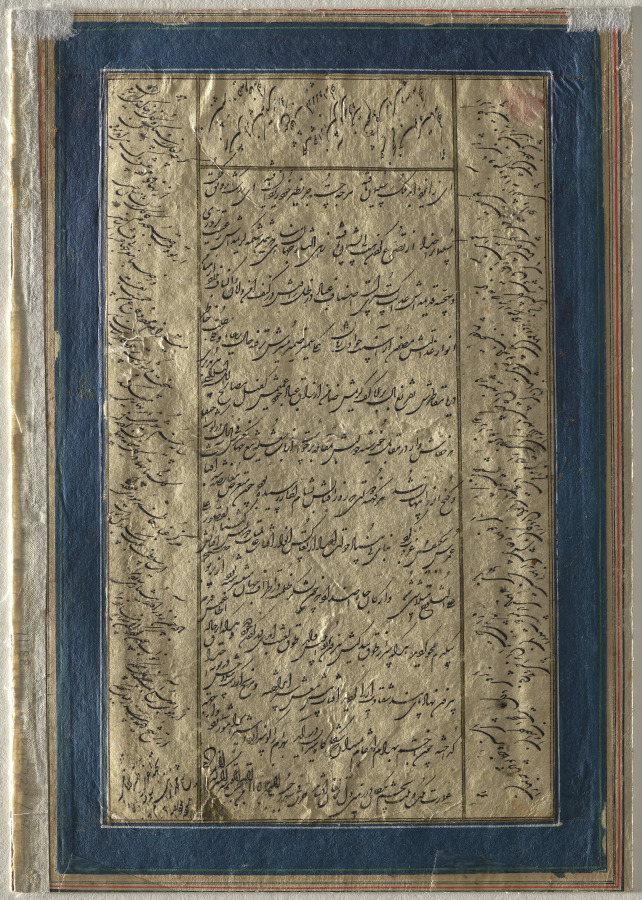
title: Grotesque Dancers Performing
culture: Mughal India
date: c. 1600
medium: gum tempera, ink, and gold on paper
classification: Painting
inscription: Unrelated later Persian text on recto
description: This scene from an unidentified manuscript depicts entertainers at the Mughal court. The dancers appear to be from the fringes of society, and they may be intended to depict tribal people or semihuman nature spirits. One is dark skinned with small elephant ears and red-rimmed eyes, wearing a white tiger-skin pelt. The female dancer wears a collar of leaves; the male figure on the right has horns, wears bells, and carries an animal-headed club that appears to be made of bone. An exuberant orchestra provides musical and vocal accompaniment below. While not an imperial production, this painting may reference the Mughal emperor Akbar’s practice of welcoming a wide range of people from all regions and traditions to his court, since he was interested in understanding their customs.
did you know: Akbar applied an aromatic paste under his arms, which stained his garment.